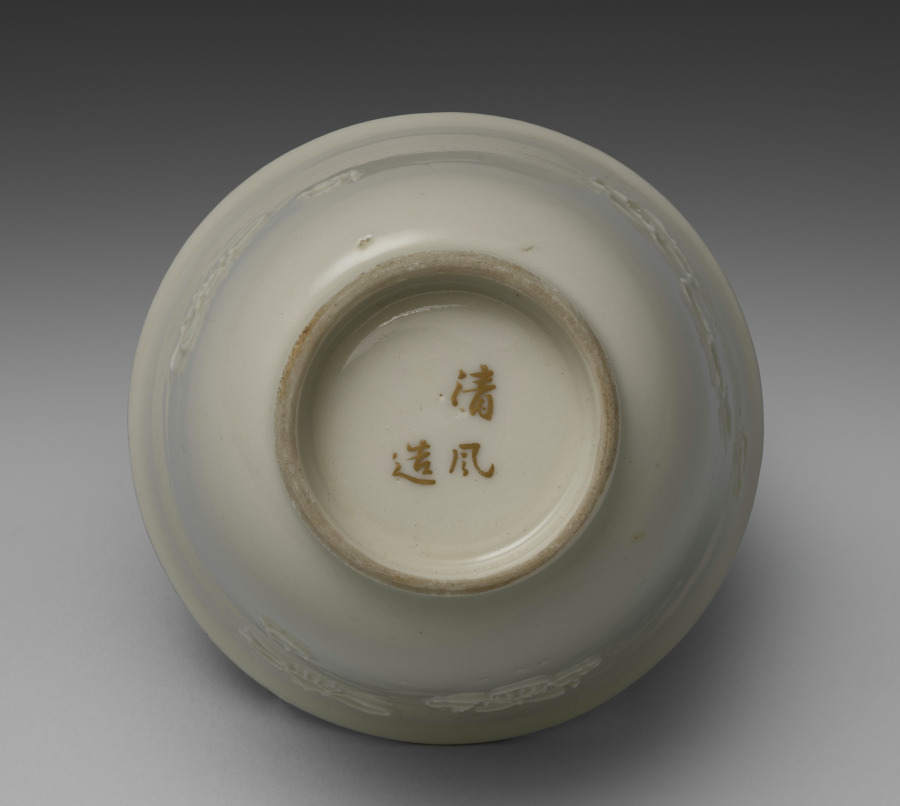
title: Drinking Cup from Dining Set with Plum Blossoms and Cracked-Ice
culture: Japan, Meiji period (1868–1912)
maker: Seifū Yohei II (Japanese, 1844–1878)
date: c. 1875–78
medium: Porcelain with molded designs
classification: Ceramic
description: Each item in this set has a delicate low-relief design of flowering plum branches over scattered, intersecting lines meant to resemble the cracked-ice surface of a frozen body of water and is signed on the base in gold pigment. While Yohei II produced many fine works in underglaze blue, like those produced by Kiyomizu Shichibei, he also made works in quite different styles later in his career, from the early 1870 s. In 1873, he was appointed purveyor to the Industrial Center of Kyoto Prefecture, a designation associated with Kyoto’s efforts to reach an international market through the port of Kobe; and from 1875 until his death, he was involved in national-level projects to present Japanese ceramics across the world. It was during this period that Yohei III was apprenticed to Yohei II, and it has been suggested that this set may in fact be an early example of Yohei III’s work, which he signed with his teacher’s name. Decorated with flowers resembling Japanese textile motifs, the set calls to mind the design of Yohei II’s pair of vases with plum blossoms in the Victoria and Albert Museum. Here, the elaborate trees created for a formal public exhibition setting have been translated into the approachable blossoms of the genteel domestic environment. While the designs are consistent across the pieces, each raised flower petal and pistil and each incised line in the ice was done by hand, so the cups, bowls, and dishes are similar yet unique. The bottoms of two boxes once identified the set’s owner, but the information has been deliberately obscured with black ink. However, inscriptions still visible appear to indicate two occasions, once at the end of July 1886 , and once again in June 1916 , when parts of the set were requested from Hokura in Niigata Prefecture. The location corresponds to a neighborhood in the present-day city of Jōetsu. The surname Tsuji 辻 also appears on a paper tag affixed to one of the box cloths. Future research may possibly reveal more about their provenance. A vase by Yohei III in a private collection combines the formal grandeur of the Yohei II vases in the Victoria and Albert Museum with the gentler design of this dining set, placing flowering plum trees against soft, scalloped-edge clouds resembling those in golden screens.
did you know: The dining wares have a creamy white coloration that the four boxes containing them identify as Korean in style.